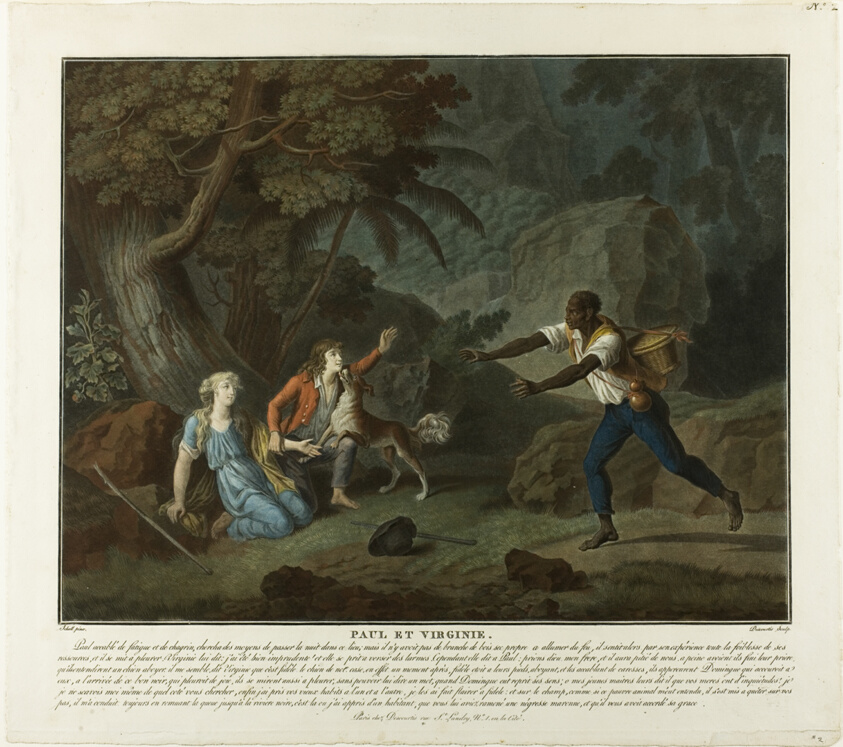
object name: Print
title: The Night, plate 1 from Paul et Virginie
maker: Charles-Melchior Descourtis (French, 1753-1820); after Jean Frédéric Schall (French, 1752-1825)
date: 1795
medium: Etching and engraving printed in yellow, blue, red, and black inks on paper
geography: France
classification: etching; print; prints and drawing